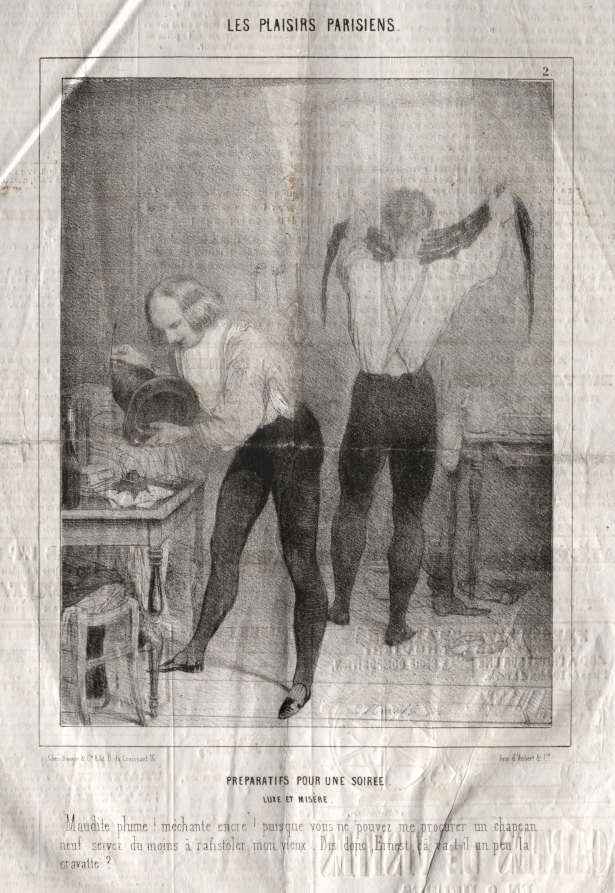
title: Les Plaisirs Parisiens: Preparatifs pour une soiree. Luxe et misère. Maudite plume! mèchante encre!...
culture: France, 19th century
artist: Charles Joseph Traviès de Villers (French, 1804–1859)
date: c. 1830–45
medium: lithograph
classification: Print